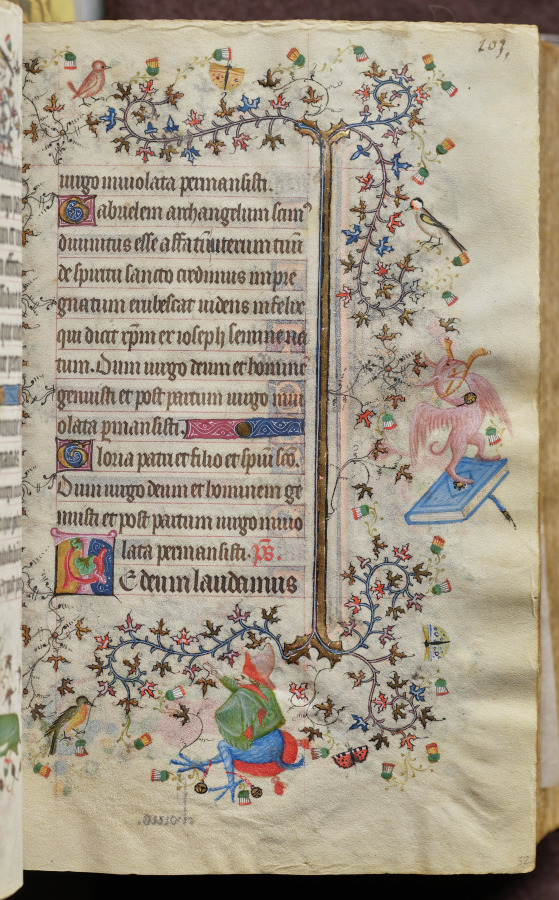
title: Hours of Charles the Noble, King of Navarre (1361-1425): fol. 52r, Text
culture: France, Paris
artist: Master of the Brussels Initials and Associates (French)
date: c. 1405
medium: ink, tempera, and gold on vellum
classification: Bound Volume